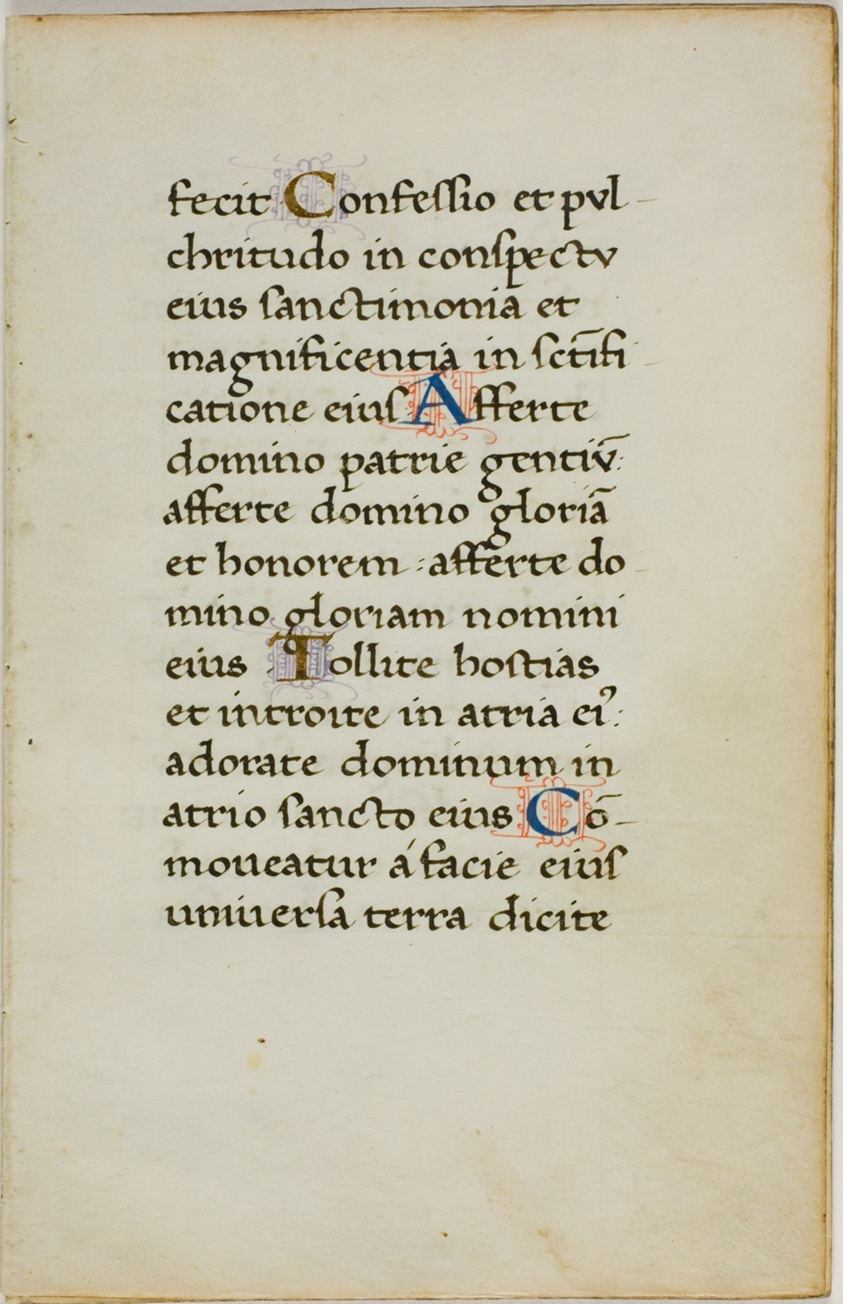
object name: Drawing and Watercolor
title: Illuminated Manuscript Leaf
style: medieval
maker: Italian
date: c. 1450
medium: Manuscript cutting with roman small letter inscriptions in black and dark brown inks, tempera and gold leaf illuminated letters, and decorations in red and lavender inks, on vellum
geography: Italy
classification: pen and ink drawings; manuscript; drawings (visual works); prints and drawing